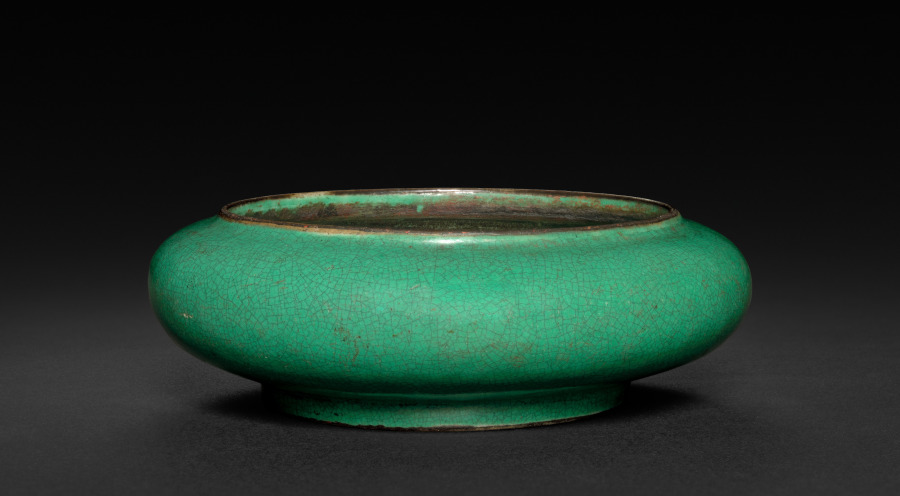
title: Flattened Globular Bowl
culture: China, Qing dynasty (1644-1911), Kangxi reign (1661-1722)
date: 1661–1722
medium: porcelain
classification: Ceramic